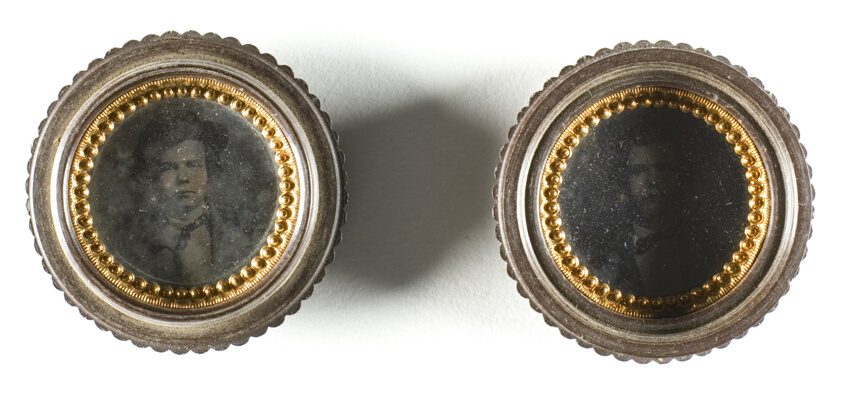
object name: Photograph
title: Untitled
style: 19th century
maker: Artist unknown; 19th century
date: 1855/75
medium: Tintypes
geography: Unknown Place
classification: tintype; photographic process; photography; photograph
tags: portraits, portraits: male subject, photography, formal portraits